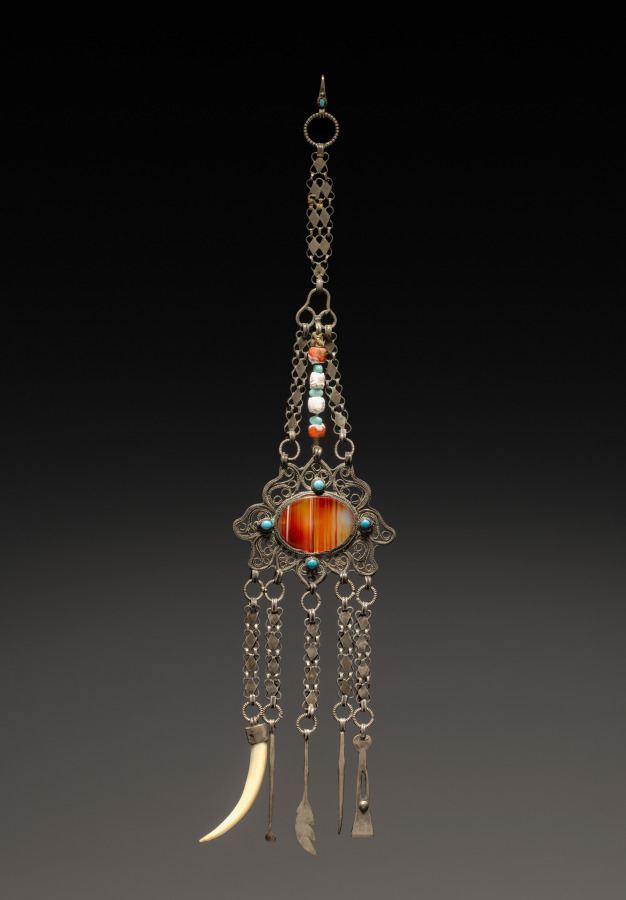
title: Chatelaine with Toilet Articles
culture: Tibet(?)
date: 1800s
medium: silver with cornelian and blue stones with blue and coral beads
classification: Jewelry